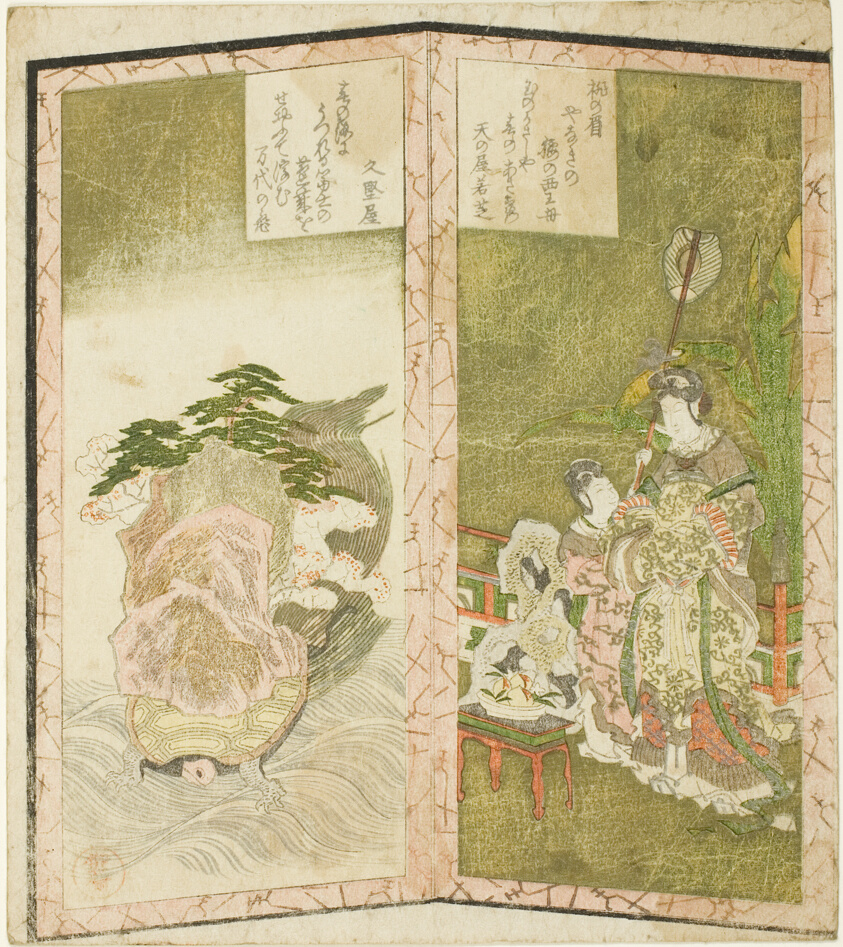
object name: Print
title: Seiobo (Queen Mother of the West) and tortoise, from an untitled hexaptych depicting a pair of folding screens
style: Japanese (culture or style)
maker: Ryuryukyo Shinsai (Japanese, c. 1764-1820)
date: c. 1825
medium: Color woodblock print; sheet from shikishiban hexaptych, surimono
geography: Japan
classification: woodblock print; print; asian art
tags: mothers, parents